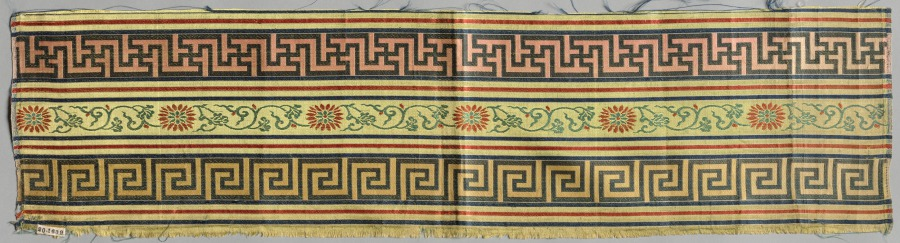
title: Border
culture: China, 19th century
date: 1800s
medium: silk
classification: Textile